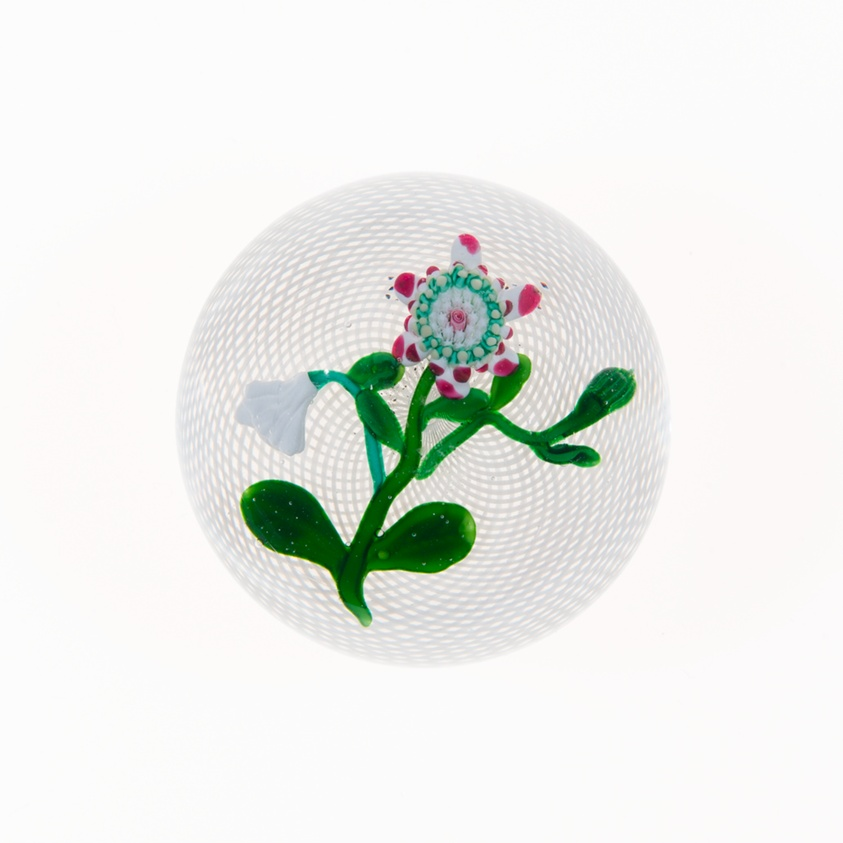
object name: Glass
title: Paperweight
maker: Clichy Glassworks (Cristalleries de Clichy); Clichy, France, 1837-1885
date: 19th century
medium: Glass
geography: Clichy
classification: paperweight; millefiori; european decorative arts; glass